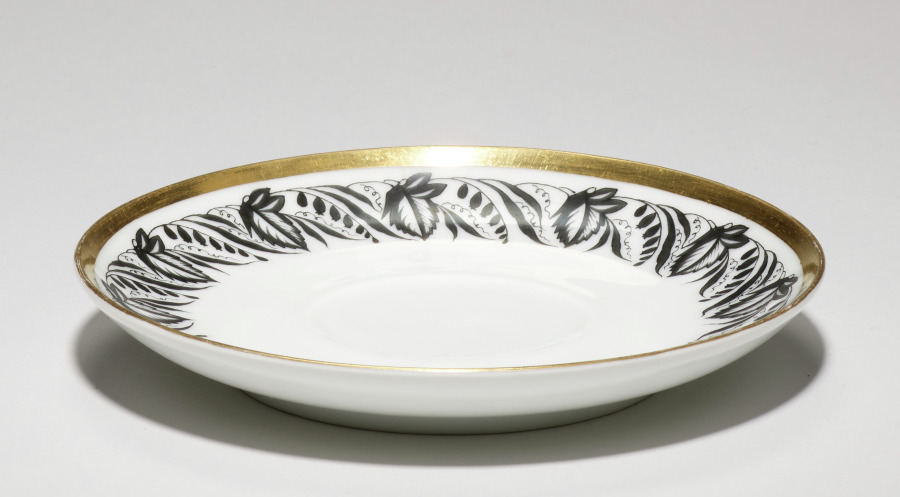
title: Saucer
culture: Russia, St. Petersburg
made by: St. Petersburg Imperial Porcelain Factory (Russian)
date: 1881–1917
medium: porcelain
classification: Ceramic